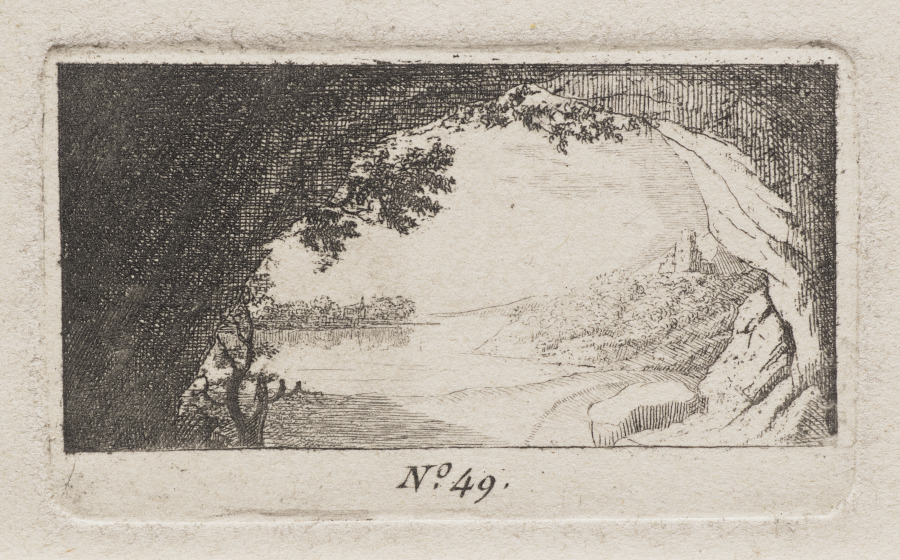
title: Landscape with Arched Rocks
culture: France, 18th century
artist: Antoine de Marcenay de Ghuy (French, 1724–1811)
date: 1778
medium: etching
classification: Print